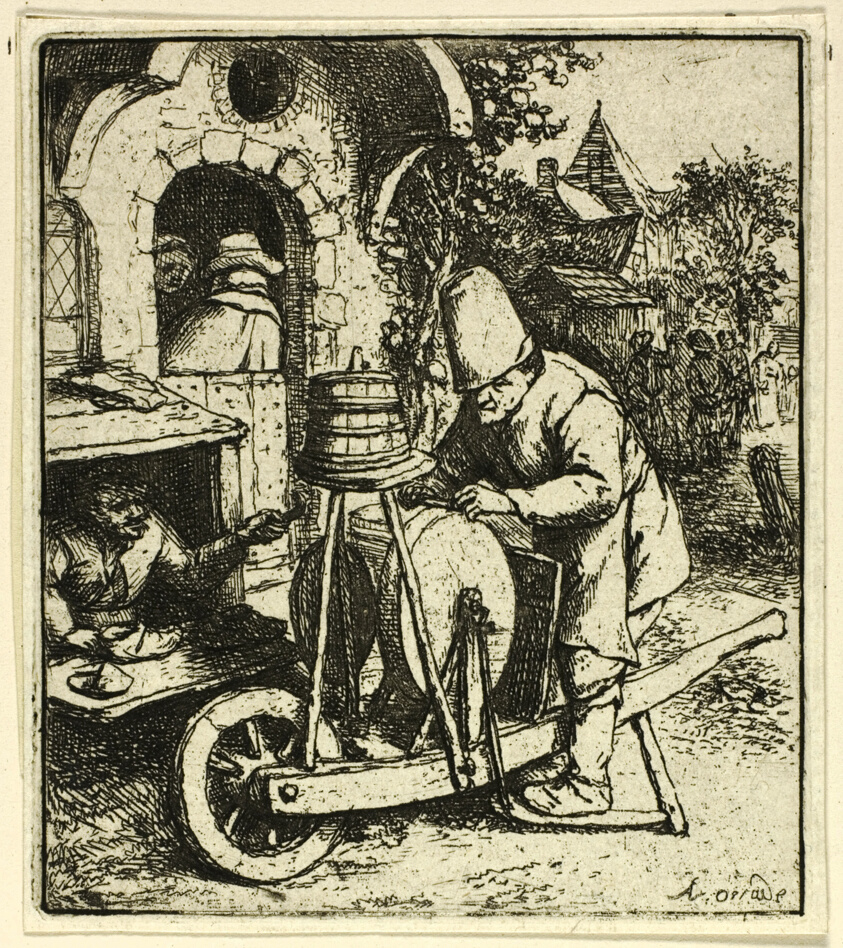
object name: Print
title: The Knifegrinder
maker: Adriaen van Ostade (Dutch, 1610-1685)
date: c. 1671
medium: Etching in black on ivory laid paper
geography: Holland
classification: etching; print; prints and drawing